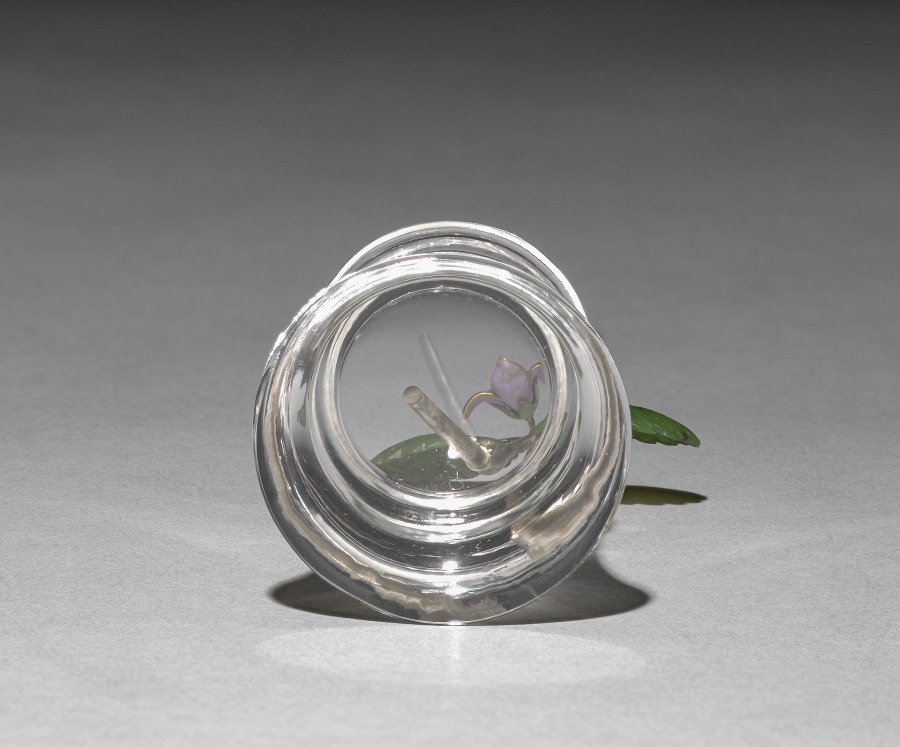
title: Flower Study of a Violet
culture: Russia, St. Petersburg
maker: House of Fabergé (Russian, 1842–1918)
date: c. 1885–1915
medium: enamel, silver gilt, jade, diamond, rock crystal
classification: Miscellaneous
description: This flower study depicts a single stem of violet. Fabergé’s inspiration for his flower studies is said to have come from the floral brooches of precious stones that were made in the 1700s for Catherine the Great as well as from the Japanese art of flower arranging, known as ikebana. Small and delicate, Fabergé’s flower studies were given as intimate gifts to friends by the tsarina and others in the court. She also liked to take them around to wherever the imperial family was residing as a reminder of spring during the harsh Russian winters.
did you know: The stems of Fabergé’s flower studies are set into little basins carved from rock crystal to resemble pots of water.